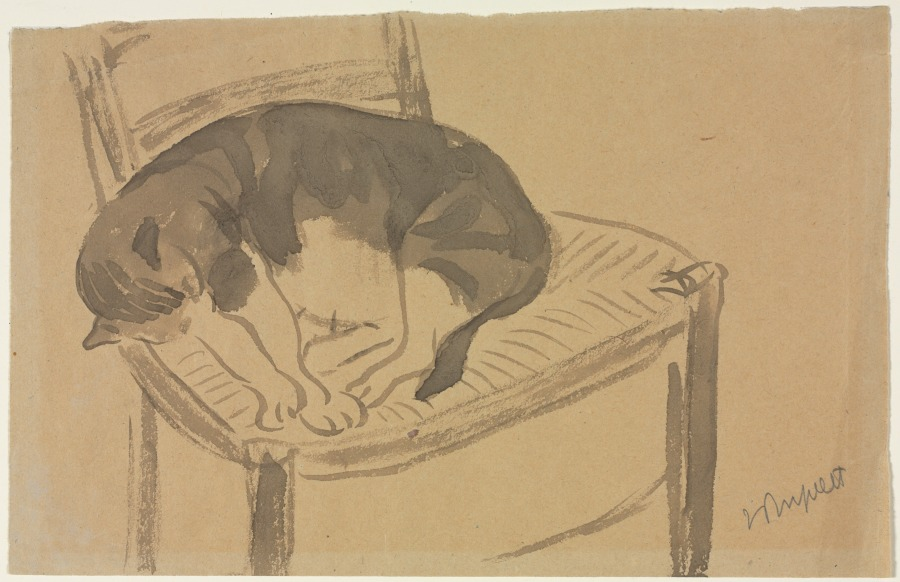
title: Sleeping Cat (recto) Torso of a Nude Woman (verso)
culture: France, 20th century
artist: Jane Poupelet (French, 1878–1932)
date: first third 1900s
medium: brush and gray wash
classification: Drawing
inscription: signed, lower right, in graphite: j Poupelet